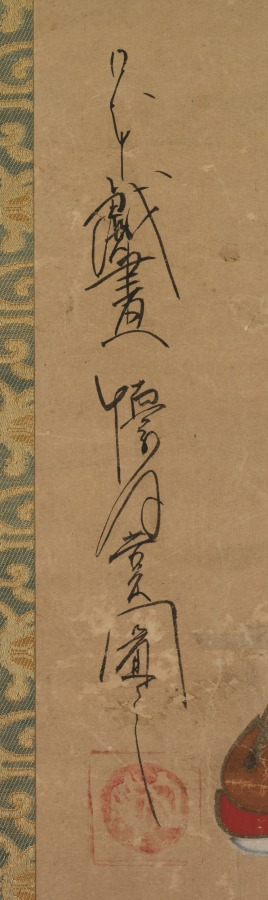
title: Courtesan and Attendant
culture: Japan, Edo period (1615–1868)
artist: after Kaigetsudō Ando (Japanese, c. 1671–1743)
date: c. 1730–1868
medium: hanging scroll: ink and color on paper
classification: Painting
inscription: signed: Nihon giga Kaigetsudō no zu